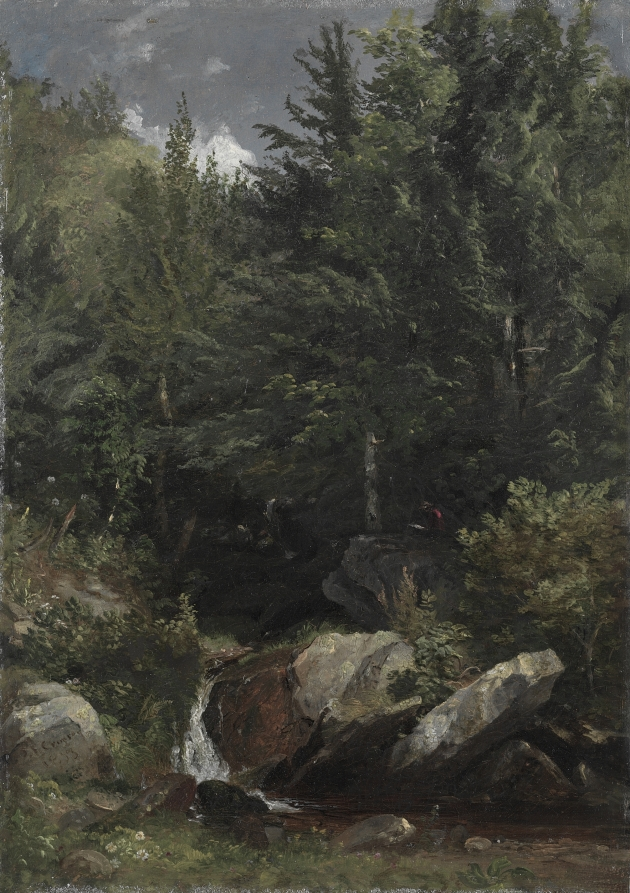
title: Trees and a Stream on a Hillside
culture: America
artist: Jasper F. Cropsey (American, 1823–1900)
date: 1853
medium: oil on board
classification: Painting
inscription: Signed lower left: "J. F. Cropsey / 1853"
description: This oil sketch was probably made on a trip through Massachusetts in the summer of 1853.